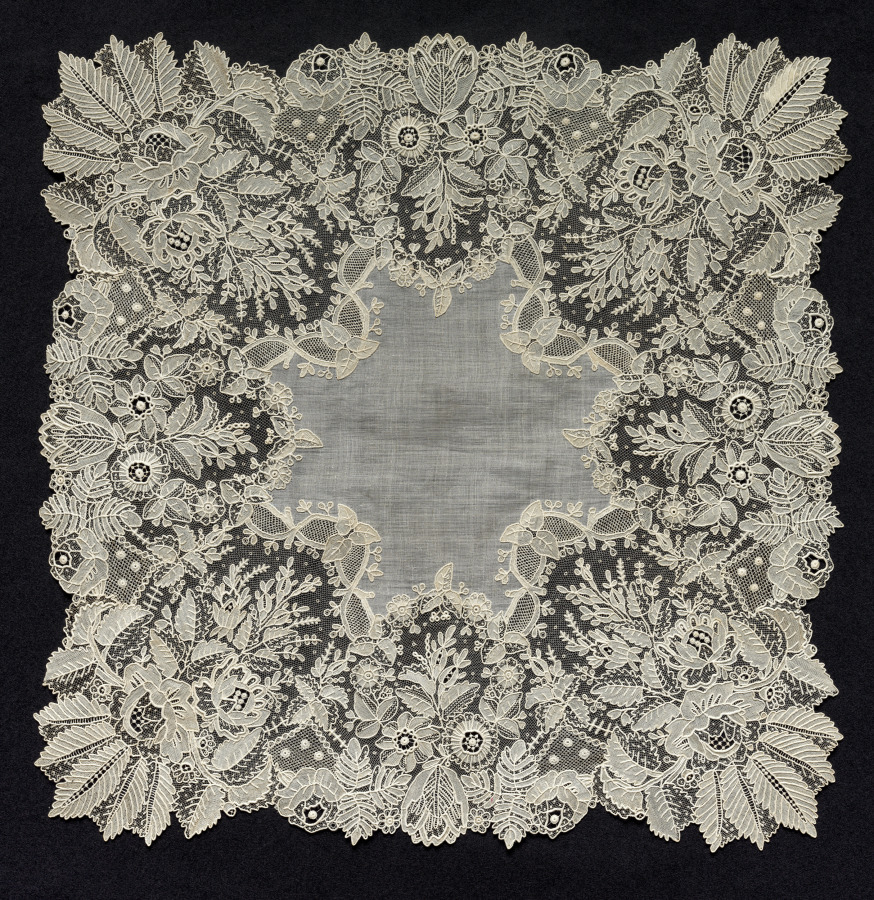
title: Lace Handkerchief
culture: Belgium, Brussels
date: 1800s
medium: Plain weave linen center; needle lace (point de gaze) border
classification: Lace